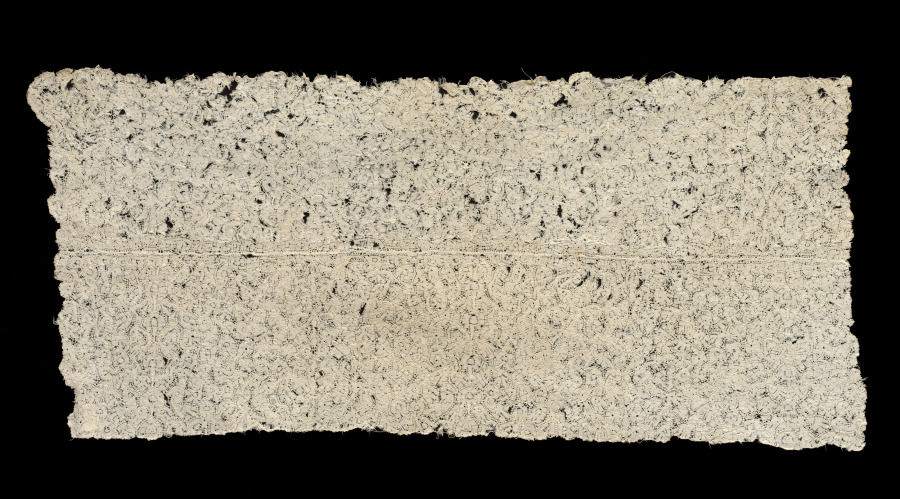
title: Lace Fragment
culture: Flanders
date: 1600–1620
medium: Linen; bobbin lace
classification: Lace